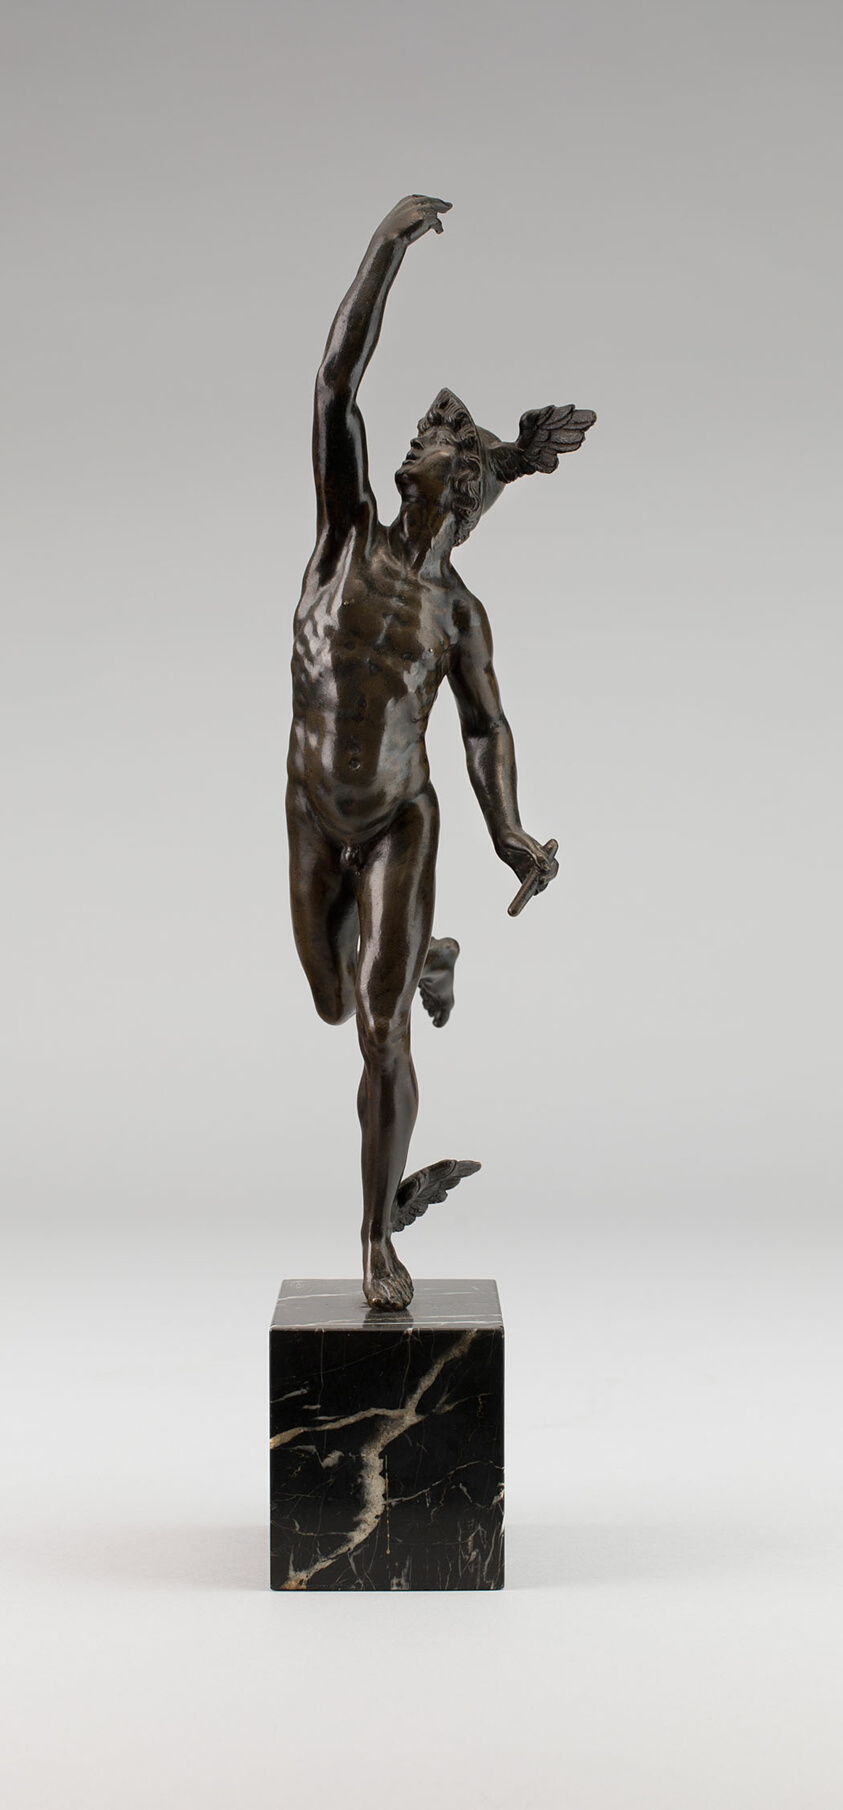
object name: Sculpture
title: Mercury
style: sixteenth century, 16th Century, 17th Century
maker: Italian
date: 1575/1625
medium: Bronze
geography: Italy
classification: statuette; sculpture; metal; bronze; figure; Italian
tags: mercury, figure, gods (deities), man, mythical, mythological figures, mythology, nudes, Roman, wings